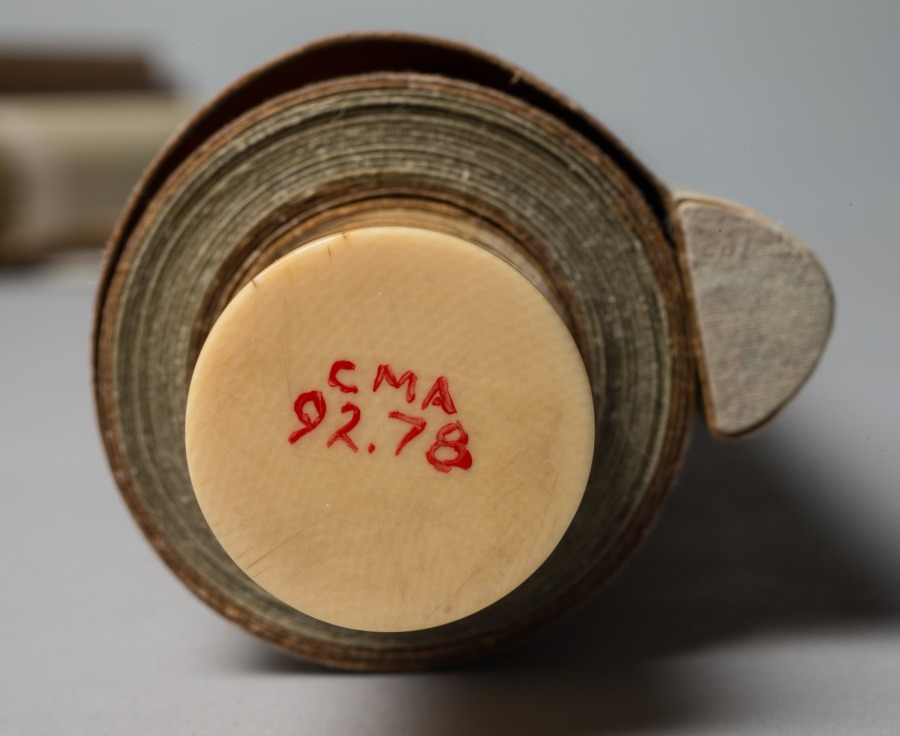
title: Minamoto no Nakakuni Visits Lady Kogō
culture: Japan, Edo period (1615–1868)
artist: Kiyohara Yukinobu (Japanese, 1643–1682)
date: late 1600s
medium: one of a triptych of hanging scrolls; ink and color on silk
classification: Painting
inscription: 款記「清原氏女雪信筆」/「清原女」朱文八角印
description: Kiyohara Yukinobu was one of Japan's earliest and most talented female painters. Kiyohara preferred Japanese-style painting techniques and subjects. Her work depicts the scenery and history of her native land. In addition to the tonalities of ink, she applied a delicate range of colors that help identify the seasons, an important theme in Japanese life and culture.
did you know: This nocturnal autumnal scene is the left part of a triptych presenting an episode from The Tale of the Heike.